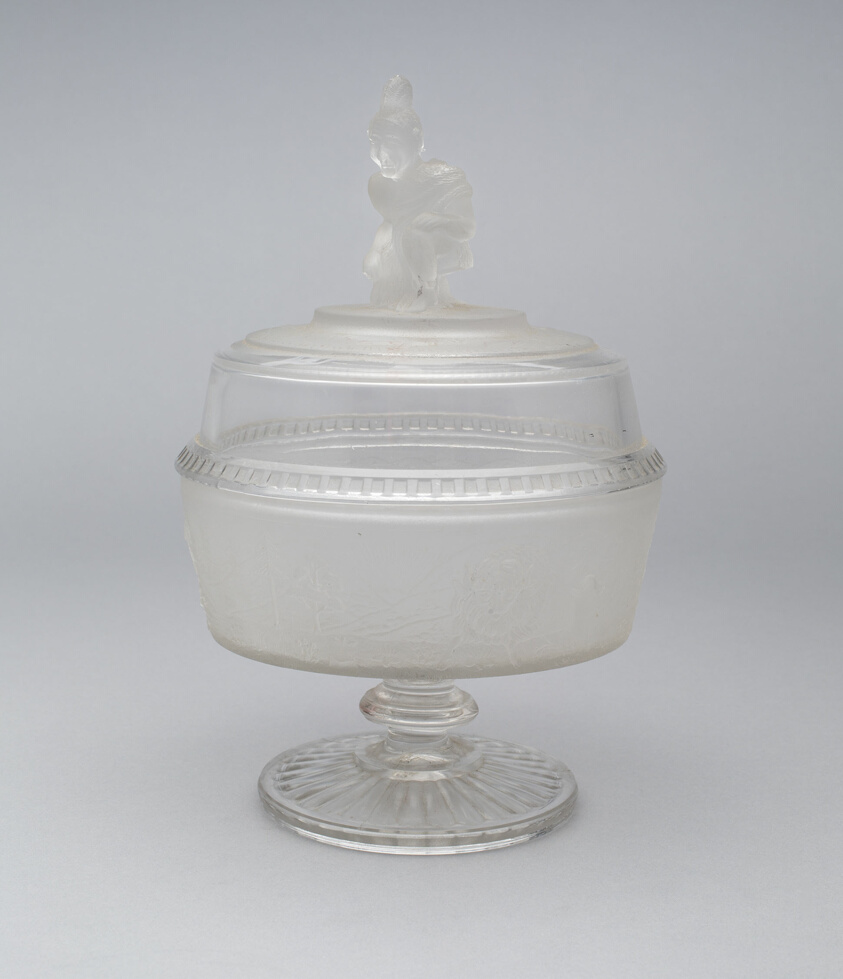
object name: Glass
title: "Westward Ho!/Pioneer" pattern covered footed compote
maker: Gillinder and Sons, 1861–c. 1930; Philadelphia or Greenbsburg, Pennsylvania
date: c. 1876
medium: Glass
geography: Philadelphia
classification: compote; glass; vessel for serving food; american decorative arts; american arts; decorative arts